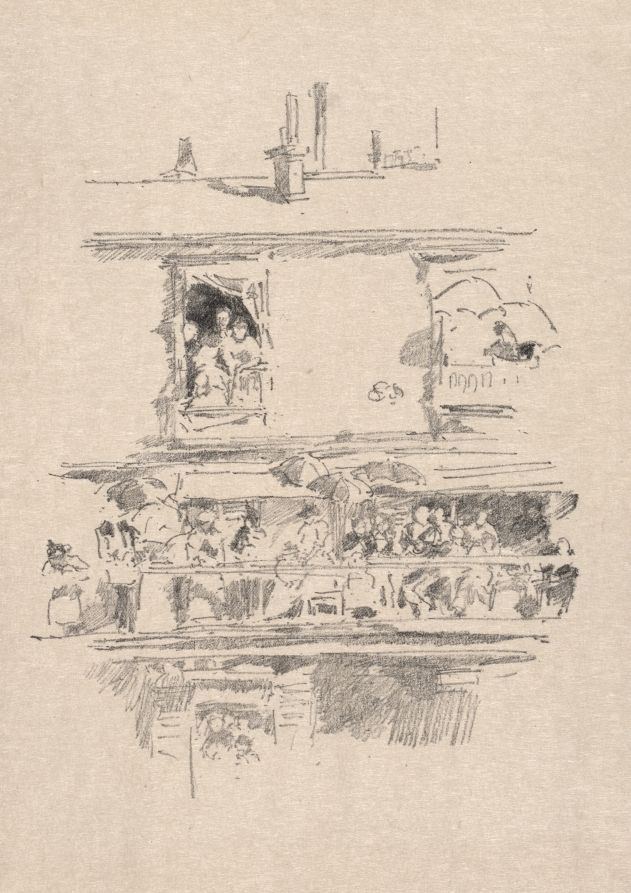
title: The Long Balcony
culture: America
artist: James McNeill Whistler (American, 1834–1903)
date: 1894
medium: lithograph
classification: Print